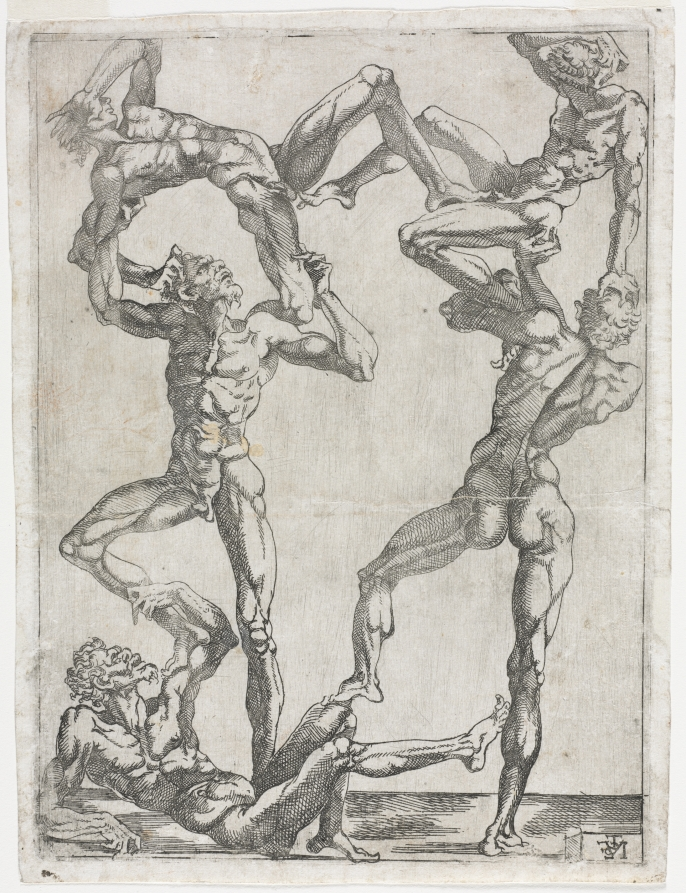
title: Pyramid of Five Men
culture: France, 16th century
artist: Juste de Juste (French, 1505–1559)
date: about 1450s-60s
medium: etching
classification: Print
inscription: Monogram in plate, lower right: IUSTE or Juste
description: Although almost nothing is known about Juste de Juste, he was probably among a circle of artists working at Fontainebleau in France in the 1540s. This eccentric composition seems to reference the twisting, turning, and balancing bodies found on the Sistine Chapel ceiling as well as the muscular nude body types associated with Michelangelo. However, the composition itself is a unique invention not derived from any specific part of the ceiling or indeed from life studies.